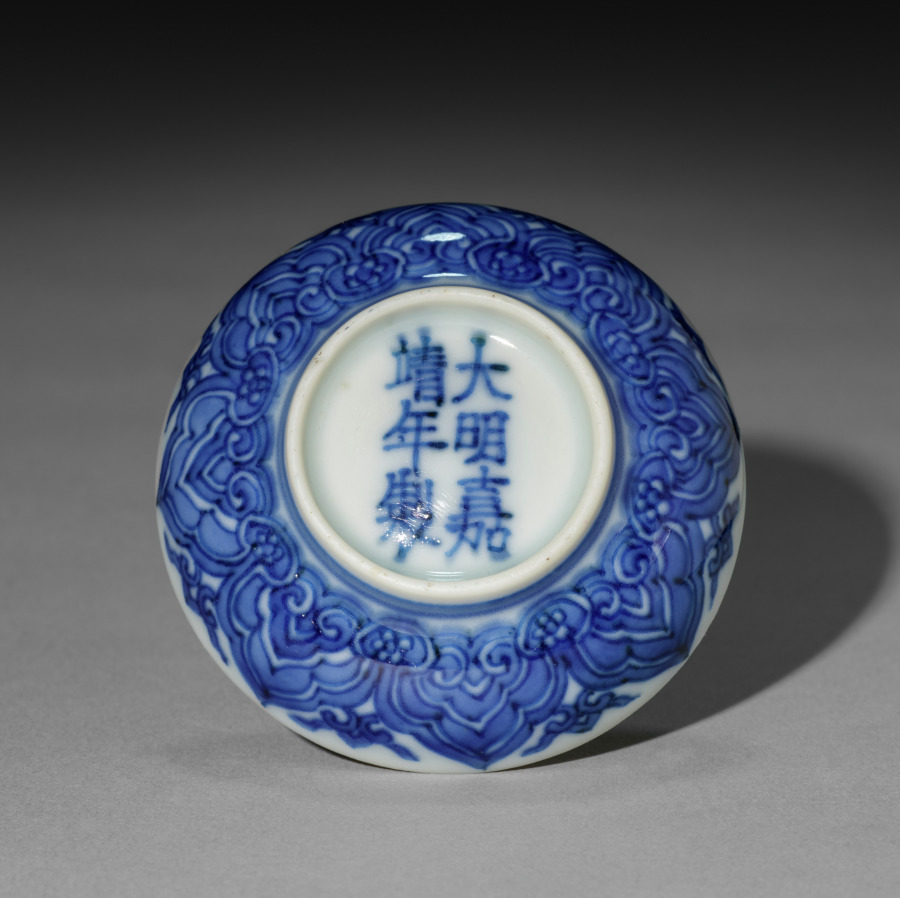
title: Round Covered Box with Medallions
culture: China, Jiangxi province, Jingdezhen kilns, Ming dynasty (1368-1644), Jiajing mark and reign (1522-66)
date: 1522–66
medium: porcelain with underglaze blue decoration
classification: Ceramic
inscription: 大明嘉靖年製